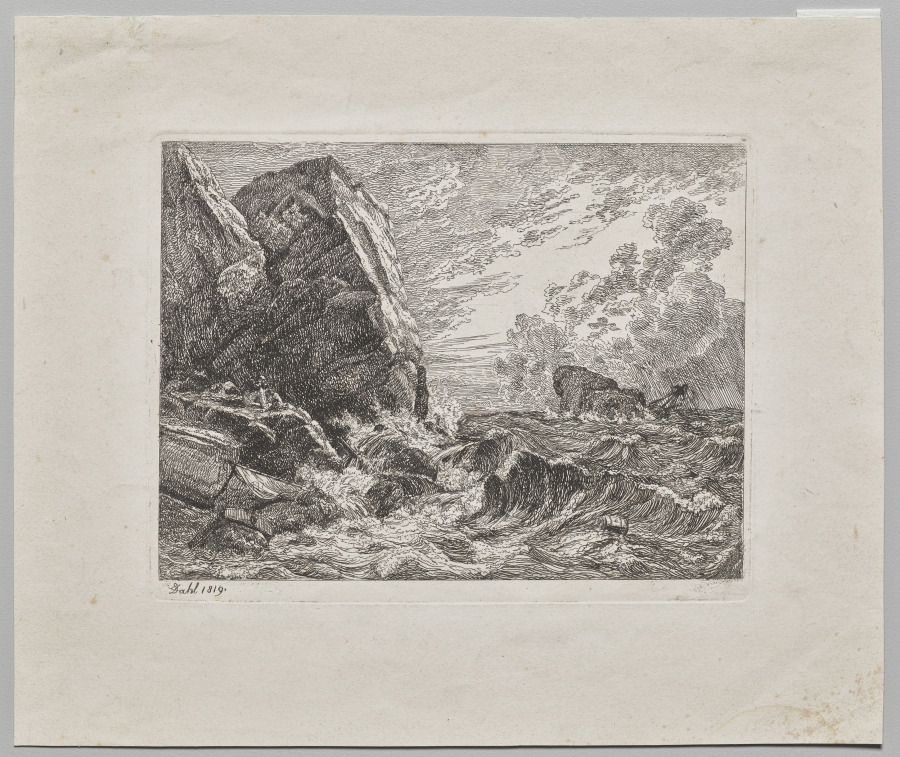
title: Norwegian Seacoast During a Storm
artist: Johan Christian Clausen Dahl (Norwegian, 1788–1857)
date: 1819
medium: etching, open-bite, black ink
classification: Print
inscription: Signed and dated in the pale below image, lower left: Dahl, 1819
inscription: Watermark: IN. BASEL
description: Johan Christian Clausen Dahl depicted his native Norway in dramatic landscapes that used figures to evoke the grandiose scale of nature. This etching—one of four created by the artist—shows the aftermath of a storm. A ship floats damaged in the distance while a man and his dog sit despondent on a massive rock nearby. Dahl rendered the sky and churning waves in jagged etched lines that suggest the violent movement and force of the sea outside Bergen, where he grew up. He considered this composition to be among his very best works.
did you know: Johan Christian Clausen Dahl described this print in his diary as depicting “the morning after a stormy night where a man has escaped from a ship stranded on the rocks.”